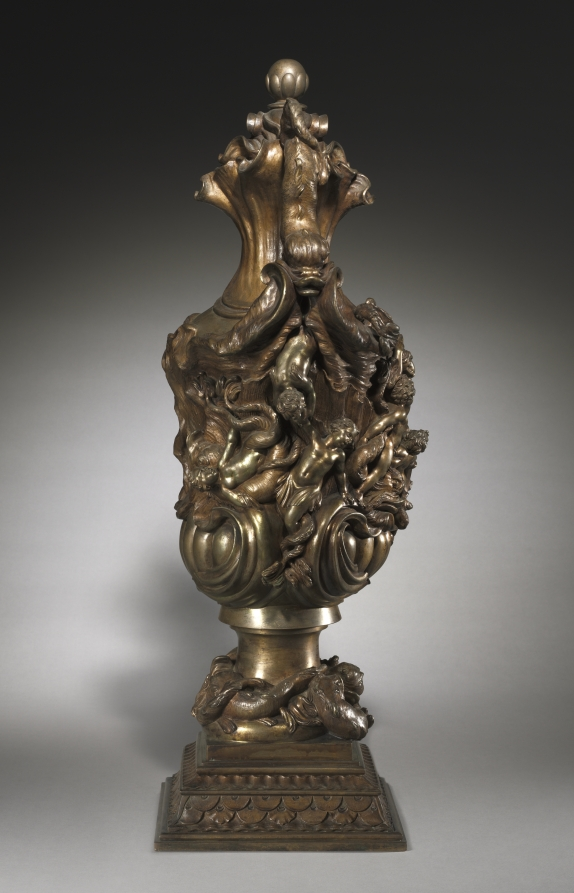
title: Ewer with Triumph of Galatea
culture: Italy, Florence, late 17th-early 18th Century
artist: Massimiliano Soldani (Italian, 1656–1740)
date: c. 1700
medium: bronze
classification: Sculpture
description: Upon discovering the sea nymph Galatea's infidelity, her betrothed, the Cyclops Polyphemus, pulverizes her lover Acis with a rock. In grief, Galatea turns his blood into a river and Acis becomes god of that river, which bears his name. Here Galatea escorts a swarm of sea creatures in celebration of Acis's apotheosis.